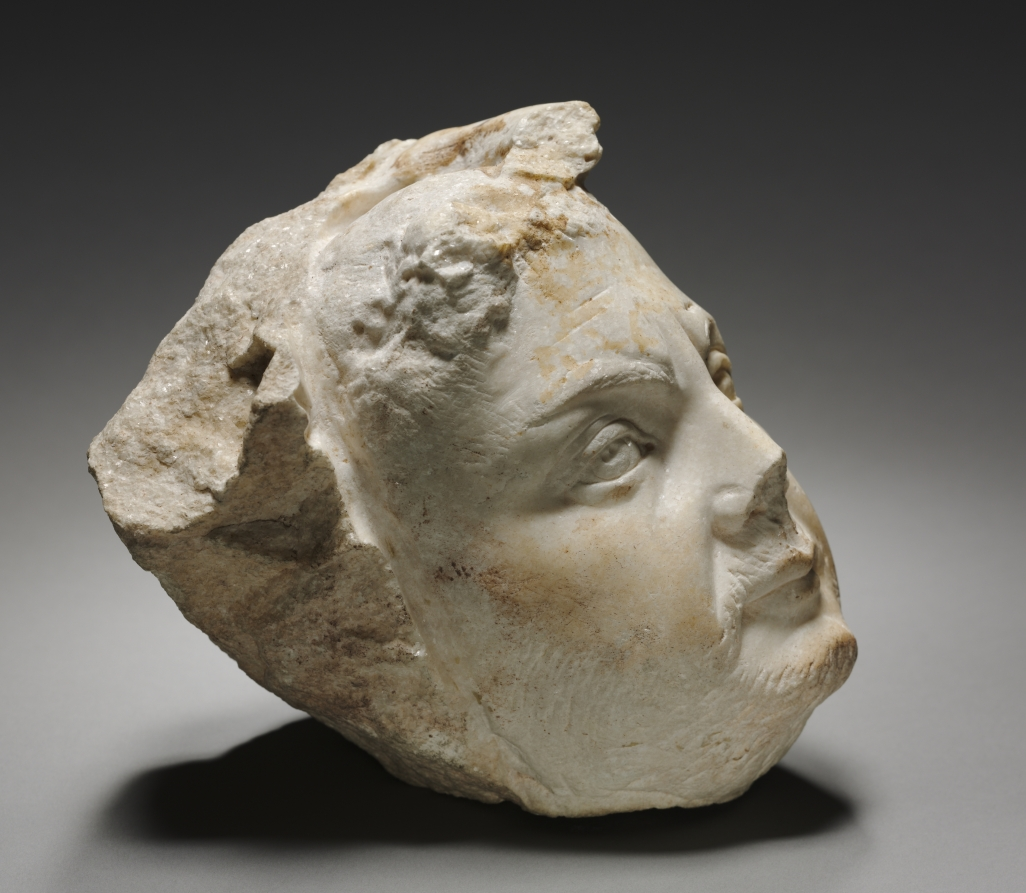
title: Relief Portrait Head of the Emperor Balbinus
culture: Italy, Roman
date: c. 238 CE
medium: marble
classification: Sculpture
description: Wearing a laurel wreath, this head belongs to the little-known Emperor Balbinus, who ruled the empire together with Pupienus for only 99 days in AD 238, the now infamous Year of the Six Emperors. Following his death at the hands of an angry mob, Balbinus and his wife (whose name remains unknown) nevertheless received a large and impressive marble sarcophagus. The couple recline together on the lid, and appear twice in relief on the front, where this head originally belonged. Remarkably, although the head was purchased in Rome in 1925, two years before the sarcophagus was discovered (in many pieces near the Praetextatus Catacombs in Rome), it was found to fit a gap in the larger sculpture in 1966. Since then, a plaster cast of the Cleveland head has remained in place on the original sarcophagus, now in the Vatican Museums.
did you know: Carved in deep relief (not quite in the round), this head comes from a large sarcophagus.